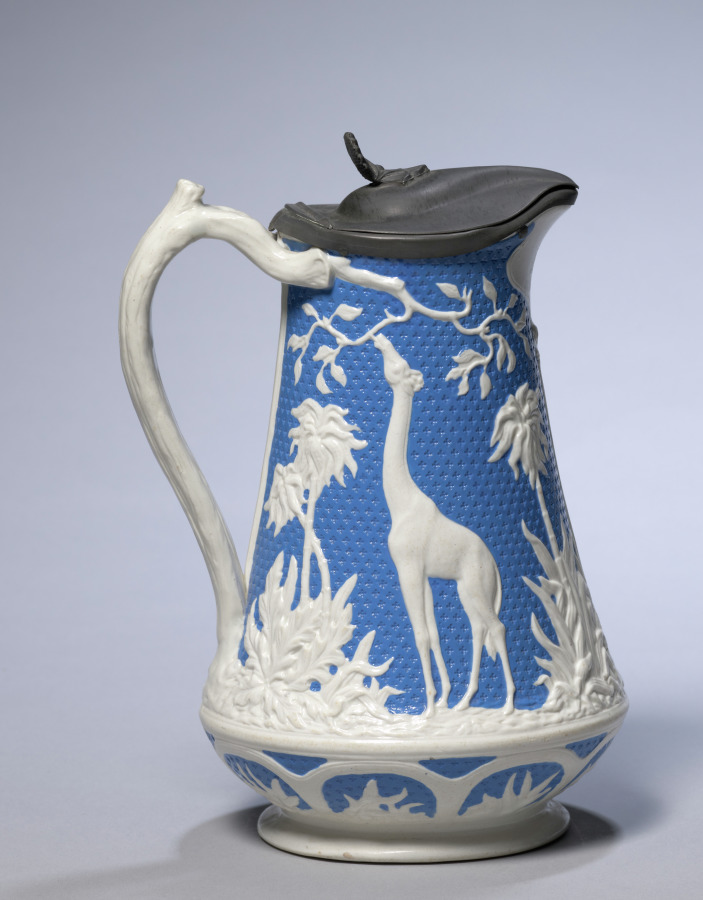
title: Jug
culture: England, Staffordshire, Burslem, 19th century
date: 1850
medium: parian ware with metal rim and cover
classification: Ceramic